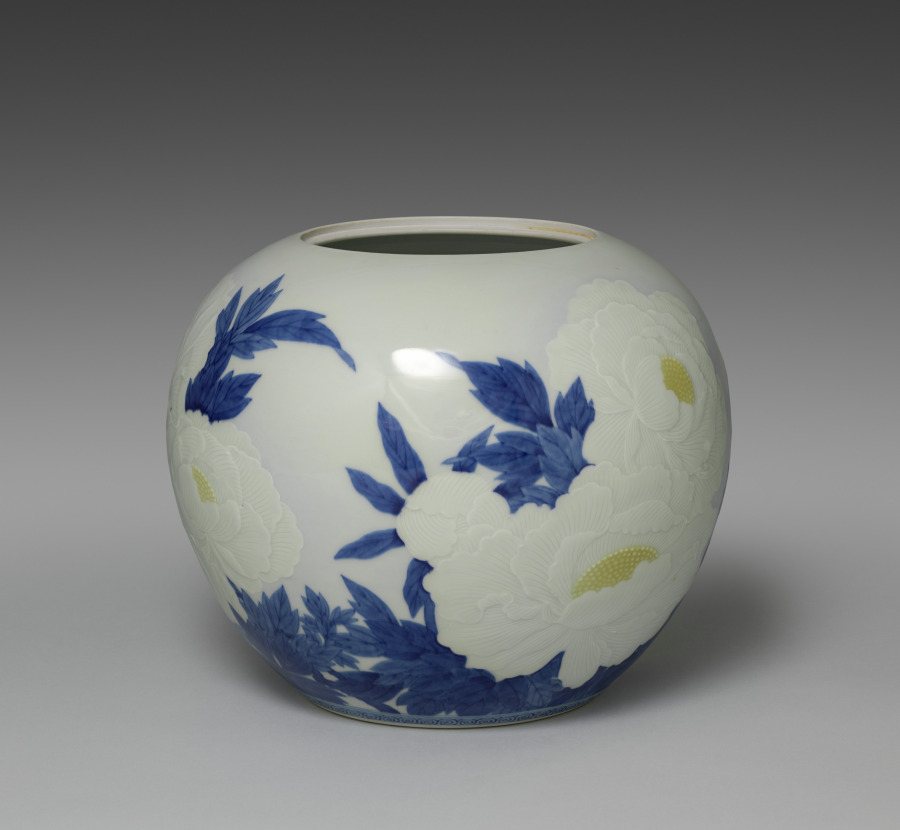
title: Jar with Peonies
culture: Japan, Meiji period (1868–1912)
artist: Seifū Yohei III (Japanese, 1851–1914)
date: 1897–1912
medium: Porcelain with underglaze blue, overglaze color enamel, molded decoration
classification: Ceramic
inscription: 大日本清風造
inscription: 金聲玉振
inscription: 帝室技芸員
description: The petals of the large, white peonies on this jar were made by applying molded clay to the body and incising the clay with lines for definition. The flowers’ centers were then painted with yellow, along with the leaves in cobalt blue line and wash. A subtle blue gradation was also added all around the flowers using a masking method. The lid, with its treasured jewel-shaped finial, was also decorated with foliate motifs in underglaze cobalt blue. Finally, a transparent glaze was applied over the entire body of both the jar and lid. It is a special demonstration of Yohei III’s use of precision and control to create a completely balanced composition.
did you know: Though Seifū Yohei III originally studied painting, he ultimately succeeded his ceramics mentor, Seifū Yohei II (1845–1878), in Kyoto.